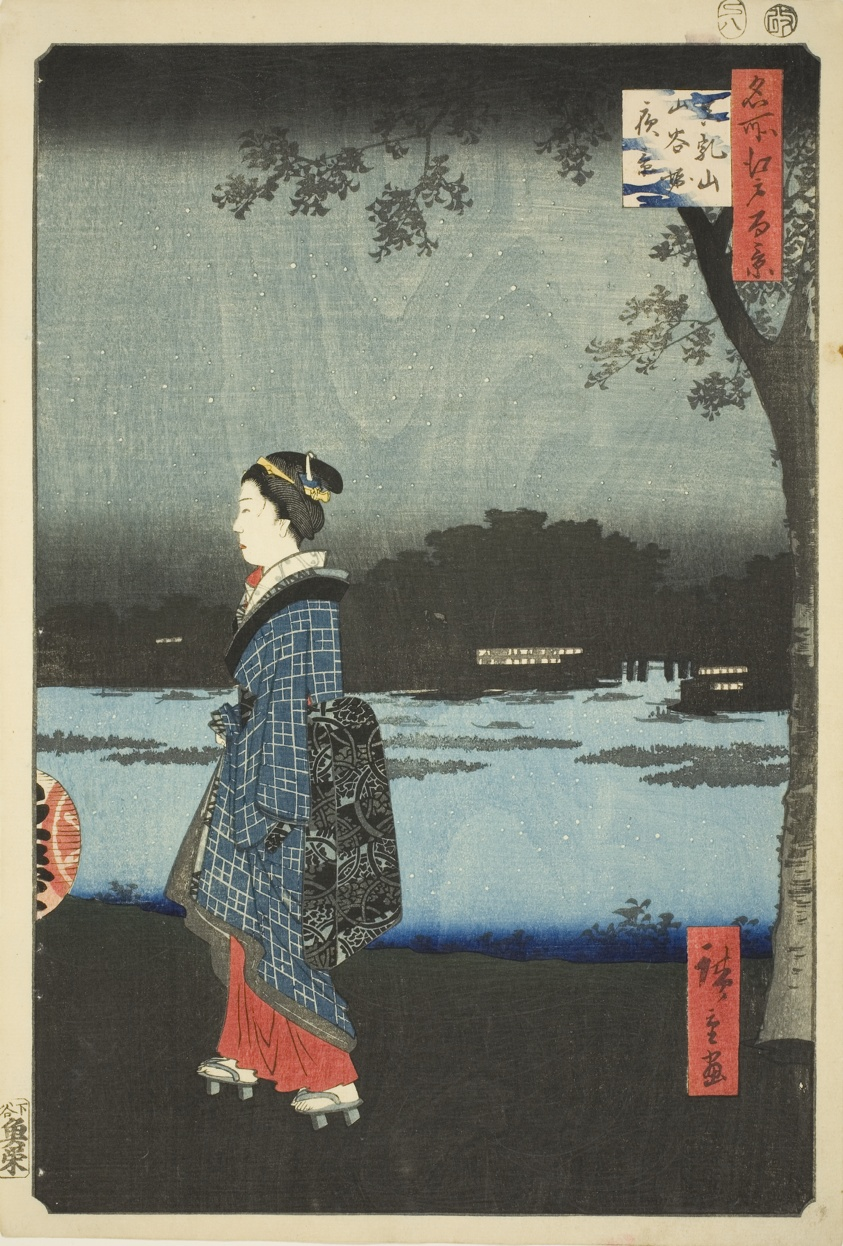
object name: Print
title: Night View of Matsuchi Hill and the San’ya Canal (Matsuchiyama San’yabori yakei), from the series "One Hundred Famous Views of Edo (Meisho Edo hyakkei)"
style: Japanese (culture or style)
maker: Utagawa Hiroshige 歌川 広重; Japanese, 1797-1858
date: 1857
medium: Color woodblock print; oban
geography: Japan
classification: woodblock print; print; asian art